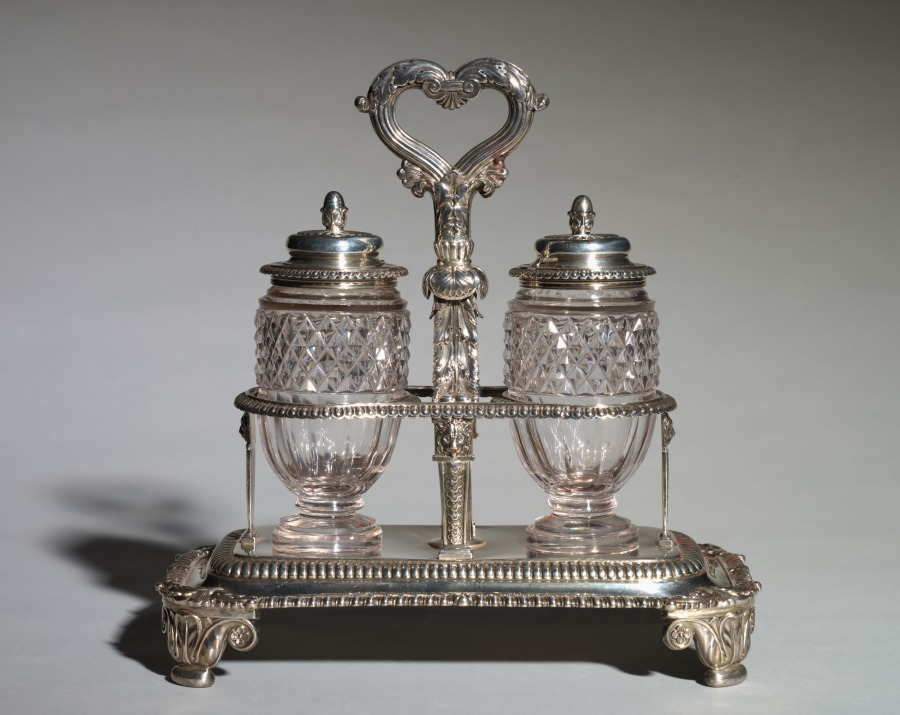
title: Cruet Set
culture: England, London, 19th century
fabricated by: Paul Storr (British, 1771–1844)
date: 1817–1818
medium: silver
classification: Silver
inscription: Stamped on lid: "PS", Lion Passant, "b".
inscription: Scratched on base of pot: "3136".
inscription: Stamped underside of base: "PS", Lion Passant, Crowned Leopard, "b", George III duty mark.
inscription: Scratched underside: "56\ Eoxx \moxx", "6087", "SRH-".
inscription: "2" engraved on base leg of stand and by pin on underside.